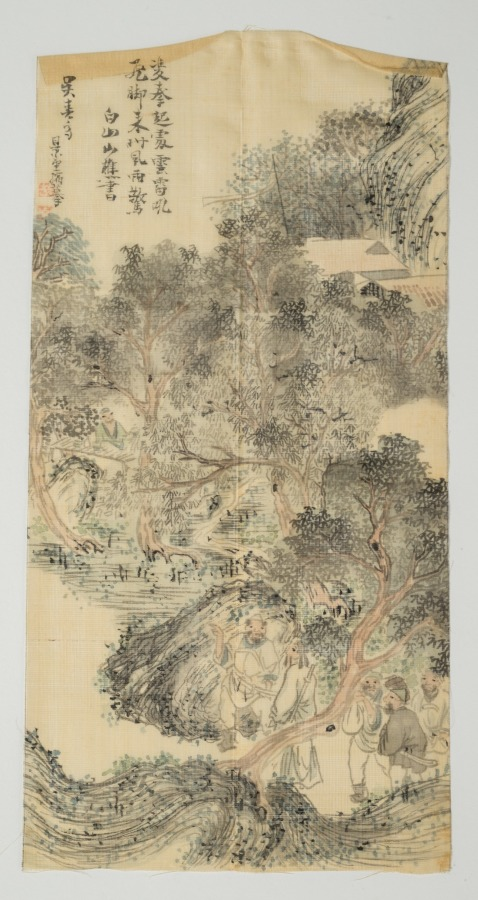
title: Happy Forest, from Water Margin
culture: Japan, Edo period (1615–1868)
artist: Matsumura Goshun (Japanese, 1752–1811)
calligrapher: and Amenomori Shōteki (Japanese, 1731–1786)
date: late 1700s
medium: hanging scroll; ink and color on paper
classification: Painting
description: The Chinese literary classic Water Margin is set in the 1120s and tells the story of 108 outlaws who first rebel against the government and then join forces with it. This painting depicts an episode in which hero Wu Song reclaims the tavern Happy Forest for its rightful owner, the prison warden’s son, Shi En. To prepare for the fight, Wu Song drinks a lot of wine. The painting was inscribed with a quote in which an ally describes Wu Song’s fighting style. It reads as follows: Where his twin fists rise, clouds and thunder roar, When his flying kick comes, wind and rain tremble.